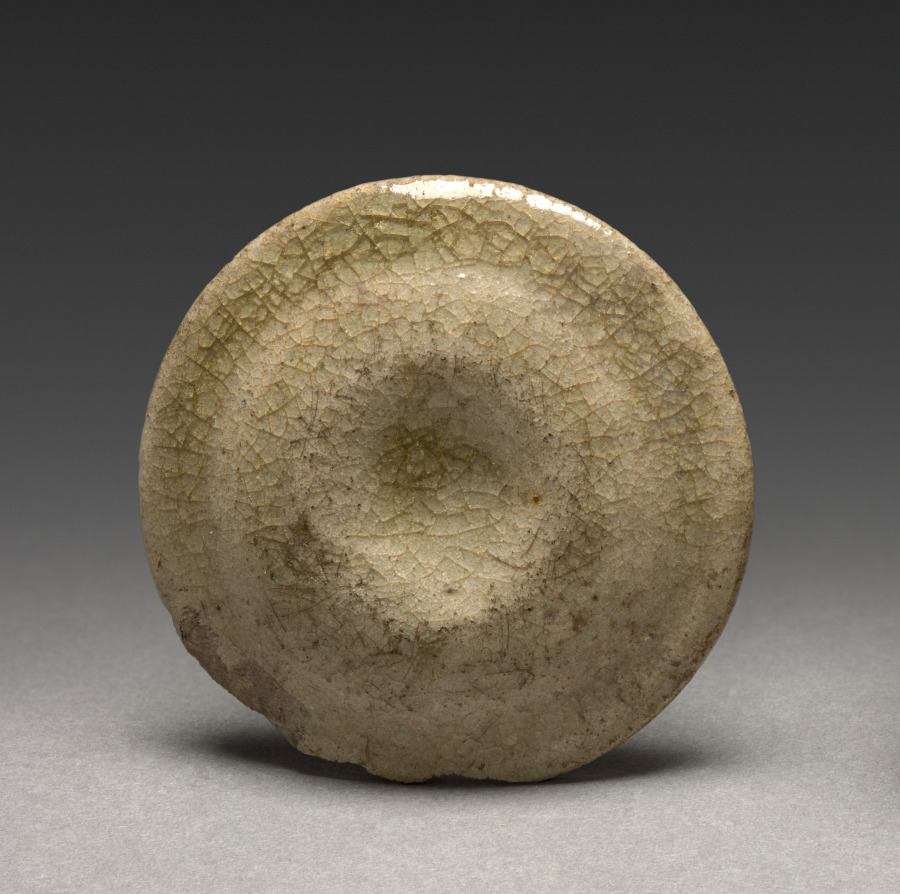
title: Incense Box (lid): Seto Ware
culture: Japan, Kamakura period (1185–1333)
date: 1200s–1300s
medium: glazed stoneware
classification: Ceramic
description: Old Seto, also called Koseto ware, was typically coated with an ash glaze in the mineral feldspar, which produced a yellow or grayish-green glaze. This palette appealed to medieval Buddhist priests and samurai alike. The practice of burning incense in religious, court, and domestic settings dates from the early 700s in Japan.